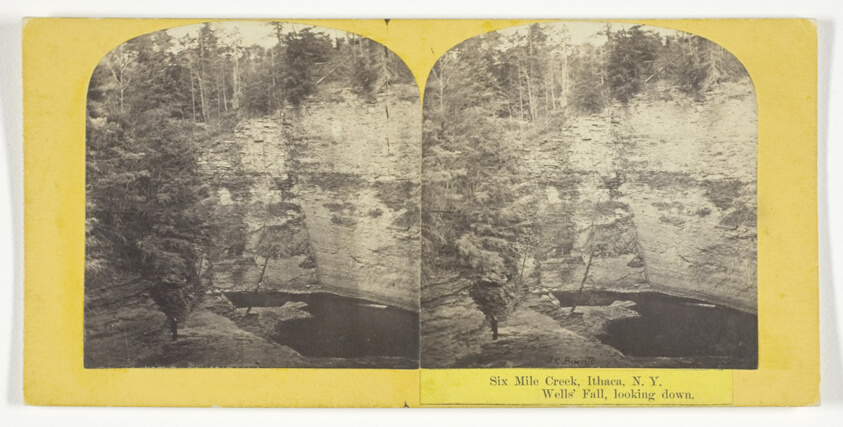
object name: Photograph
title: Six Mile Creek, Ithaca, N.Y. Well's Fall, looking down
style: 19th century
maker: J. C. Burritt; American, active 1860s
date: 1860/65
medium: Albumen print, stereo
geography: Ithaca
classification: photography; photograph; albumen silver print; stereograph (albumen)